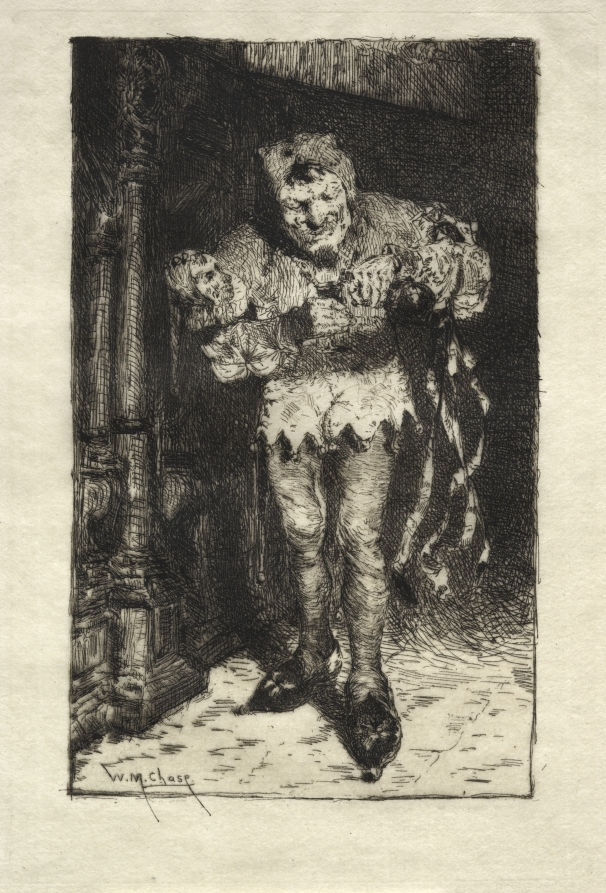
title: The Jester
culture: America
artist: William Merritt Chase (American, 1849–1916)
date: c. 1890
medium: etching and drypoint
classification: Print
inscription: inscribed in plate: W.M. Chase (l.l)